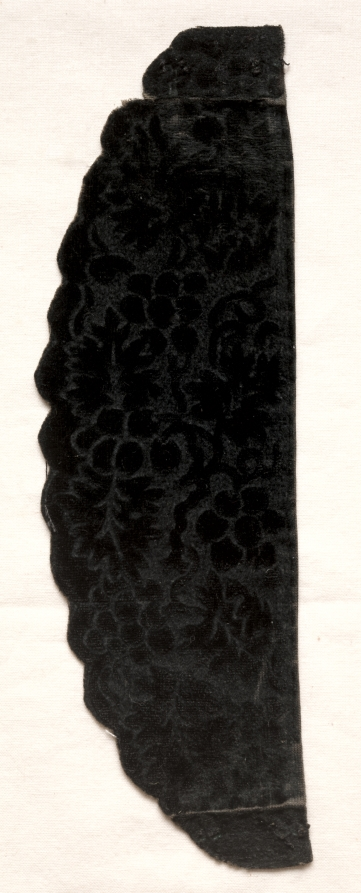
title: Velvet Cuffs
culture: France, 19th century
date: 1800s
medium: velvet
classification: Velvet